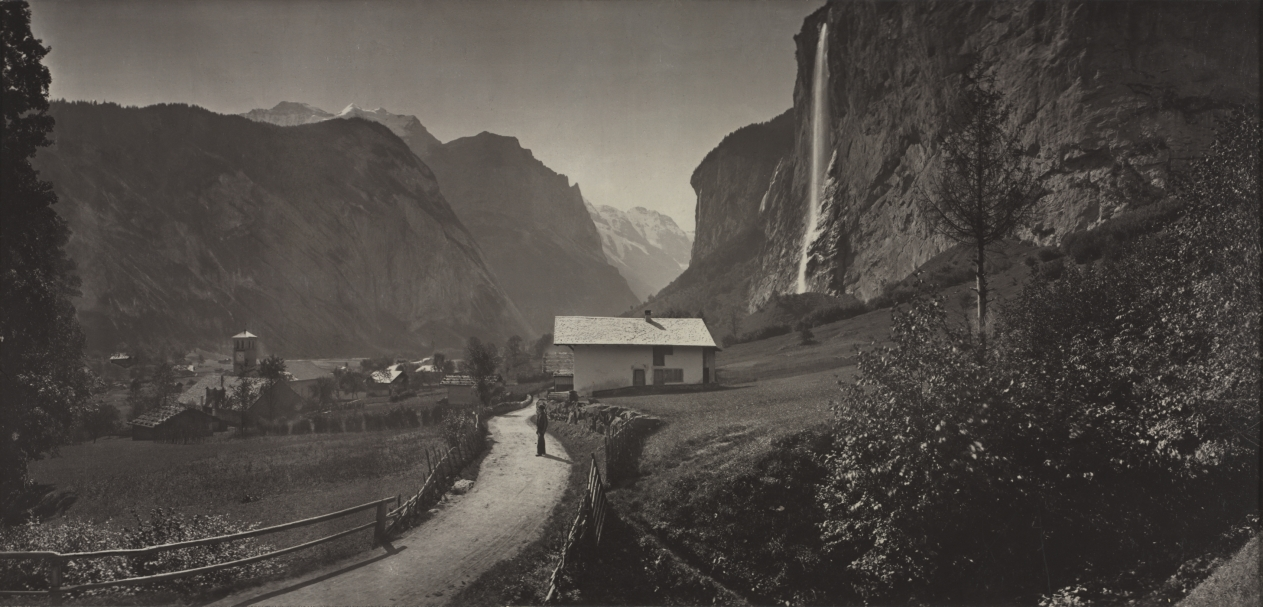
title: Valley of Lauterbrunnen, Switzerland (from the album Charbons de Braun- vues prises avec l'objectif panoramique mobile, 1868)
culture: France, 19th century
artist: Adolphe Braun (French, 1812–1877)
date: c. 1868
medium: carbon print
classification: Photograph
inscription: Written in pencil on recto: "Vallée de Lauterbrunnen= Suisse"; in pencil on verso: "12"/ "3500"